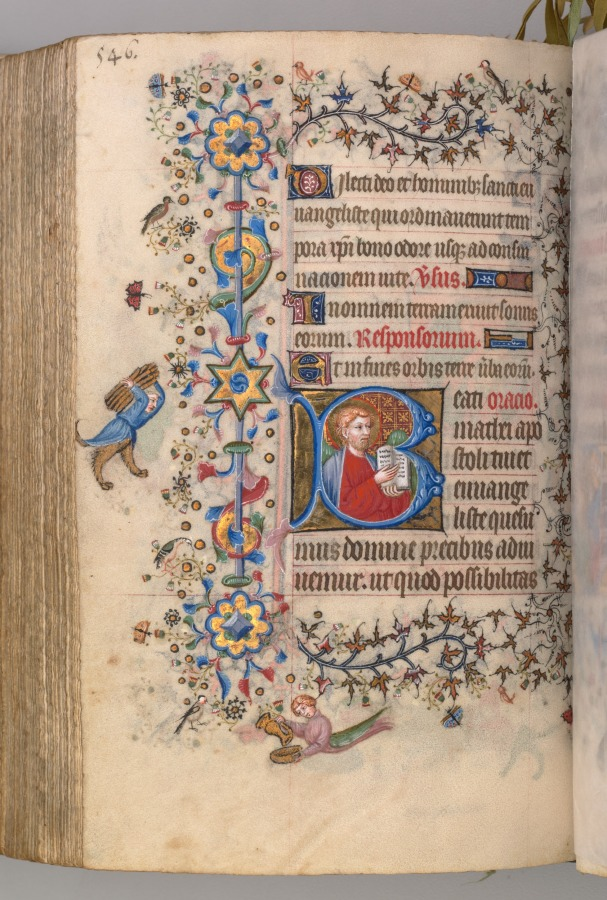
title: Hours of Charles the Noble, King of Navarre (1361-1425): fol. 267v, Text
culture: France, Paris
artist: Master of the Brussels Initials and Associates (French)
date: c. 1405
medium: ink, tempera, and gold on vellum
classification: Bound Volume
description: This precious volume was obviously highly prized by its owner, the French-born King of Navarre, who had his coat of arms painted on no less than twenty folios. Rather than directly commissioning this manuscript from a specific workshop, it seems that Charles the Noble acquired his book of hours -- perhaps ready-made for the luxury market -- while on a trip to Paris in 1404-05. A collaborative effort, six painting styles are evidenced within the pages of this codex, those of two Italians, two Frenchmen, and two Netherlanders. The painter who was responsible for the planning and decoration of the book, and who produced seventeen of the large miniatures, was a Bolognese artist known as the Master of the Brussels Initials. His principal assistant, responsible for most of the borders, was a Florentine who signed his name "Zecho" da Firenze on folio 208 verso.